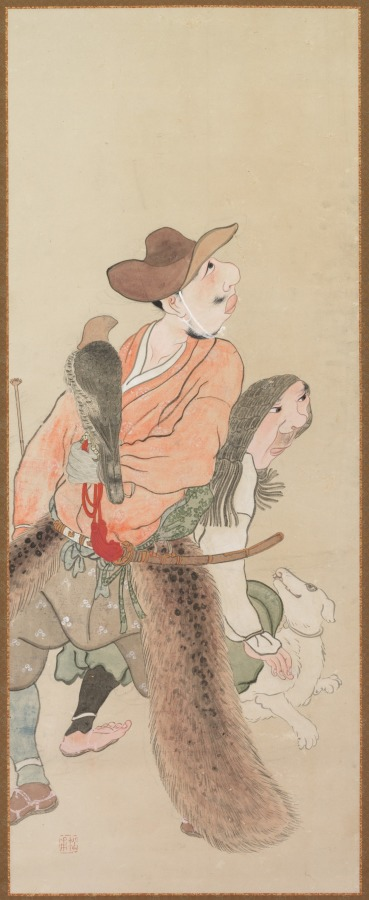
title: Genre Figures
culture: Japan, Edo period (1615–1868)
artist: Takebe Sōchō (Japanese, 1760–1814)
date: c. 1816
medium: hanging scroll; ink and color on paper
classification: Painting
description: Though rarely mentioned in official histories, Socho was an accomplished painter whose talent is readily apparent to the modern eye. For his compositions he chose traditional Japanese stories or everyday events. This painting belongs to a triptych (set of three) that was recently converted from folding screen panels to hanging scrolls.